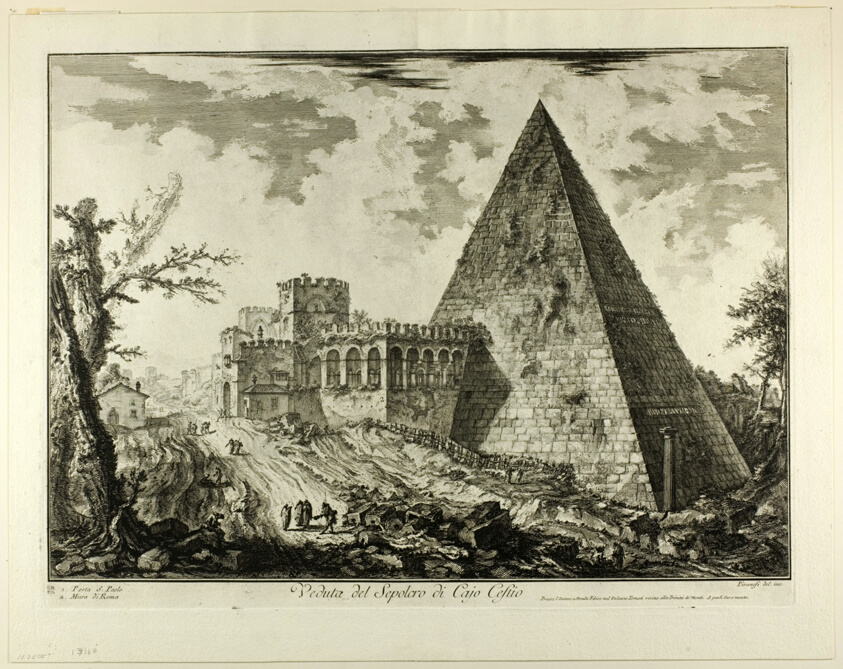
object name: Print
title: View of the Pyramidal Tomb of Cestius, from Views of Rome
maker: Giovanni Battista Piranesi (Italian, 1720-1778)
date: 1750/59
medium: Etching on heavy ivory laid paper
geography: Italy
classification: etching; print; prints and drawing